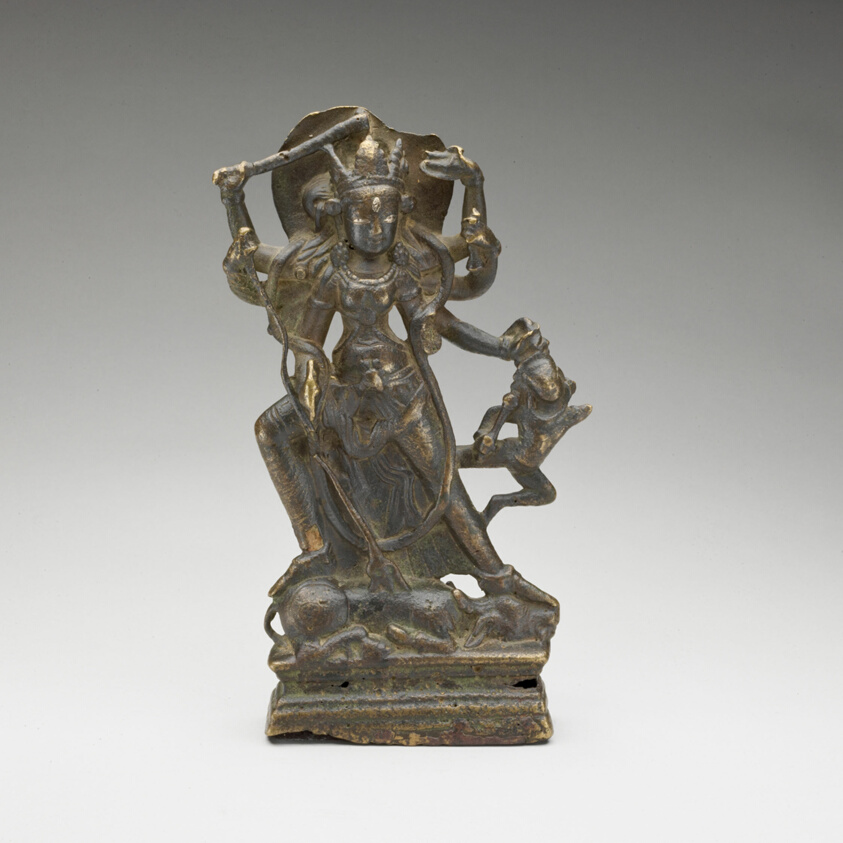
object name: Sculpture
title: Goddess Durga Slaying the Buffalo Demon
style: South Asian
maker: India or Pakistan; Kashmir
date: 9th century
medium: Bronze inlaid with silver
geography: Kashmir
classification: bronze; metal; sculpture; asian art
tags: Durga, Hindu, goddesses, gods (deities)